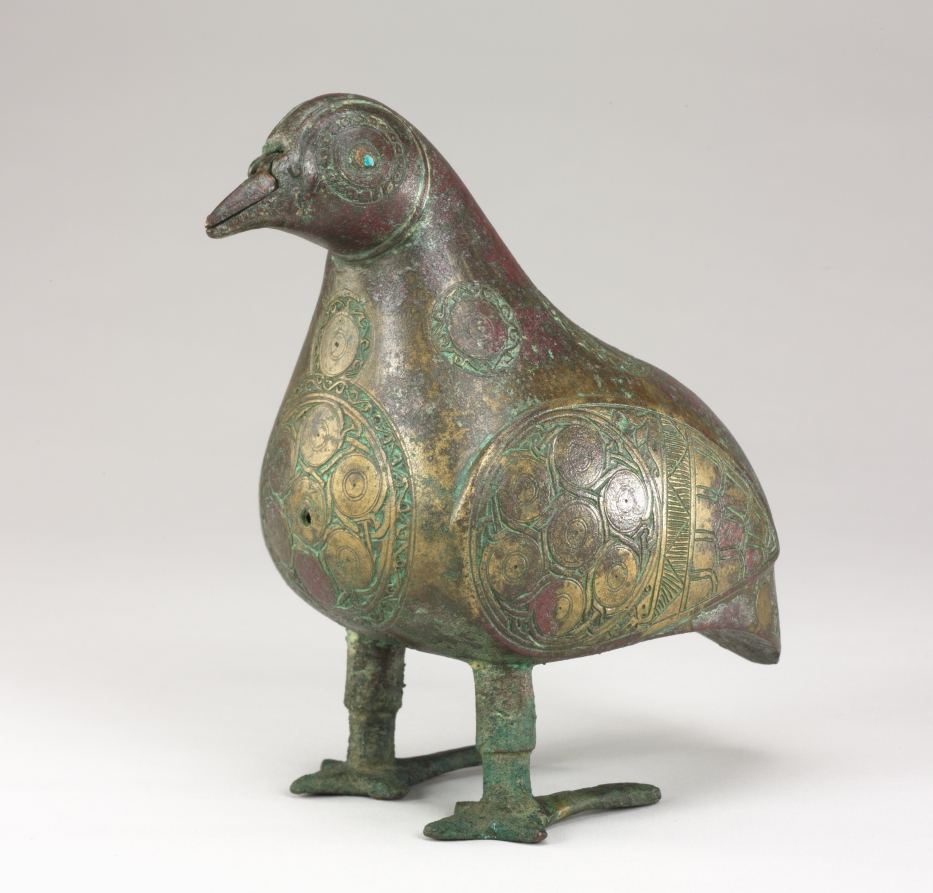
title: Bird-shaped Vessel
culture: Iran, Seljuq period (1037–1194)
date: 1100s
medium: bronze, cast, with chased and chiseled decoration; eyes inlaid with blue glass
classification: Metalwork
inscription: Kufic inscription above tail feathers, undeciphered, possibly pseudo-inscription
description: This bird-shaped vessel may have been used as a medieval water vessel (aquamanile) for pouring water used in handwashing—an important element of secular and sacred rituals. In this piece, water could have been placed in the vessel through a hole in the bird’s chest and then poured out through the hinged beak. Birds in Islamic art often represented messengers and protectors, or symbolized freedom of the spirit and soaring of the soul. Possibly the blue-green eyes were considered good luck charms to protect the owner from the evil eye and to ward off misfortune.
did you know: There is an undeciphered Kufic inscription above the bird's tail feathers.